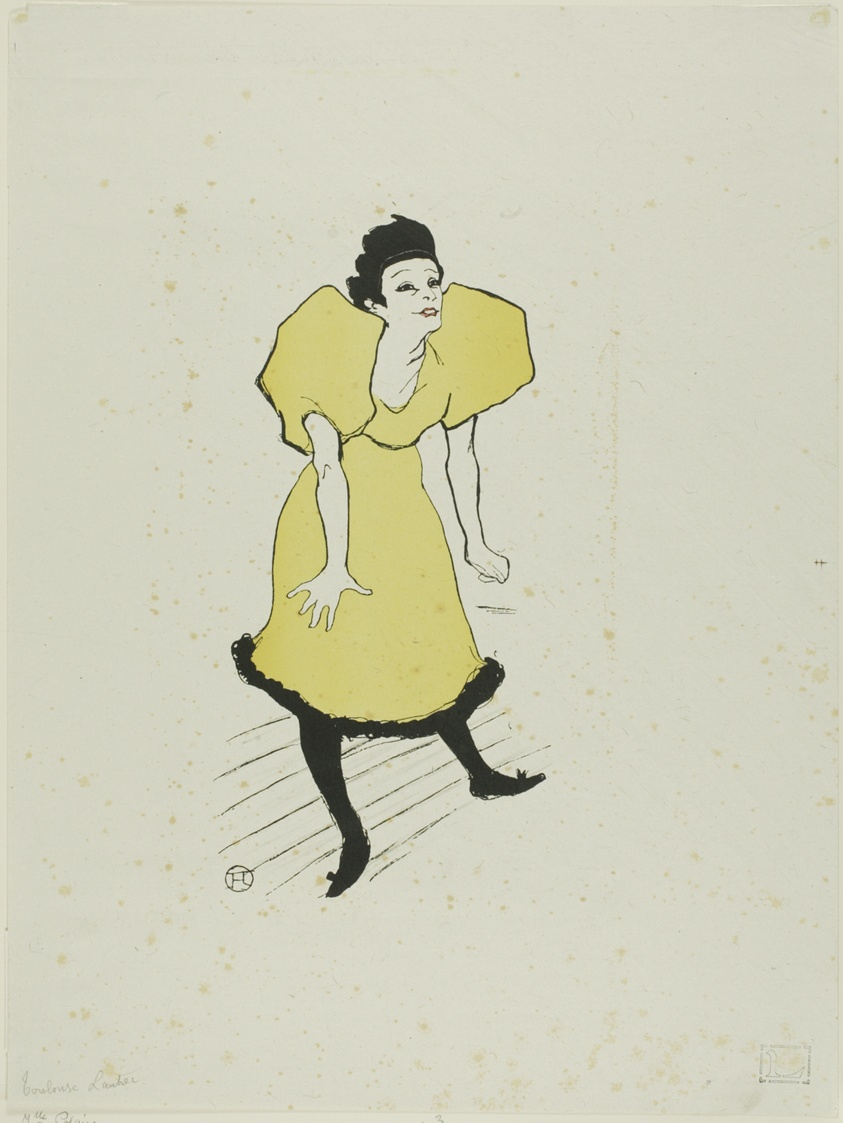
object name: Print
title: Miss Polaire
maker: after Henri de Toulouse-Lautrec; French, 1864-1901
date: published February 23, 1895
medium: Color lithographic reproduction of a photorelief print on grayish wove chine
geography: France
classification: lithograph; print; prints and drawing